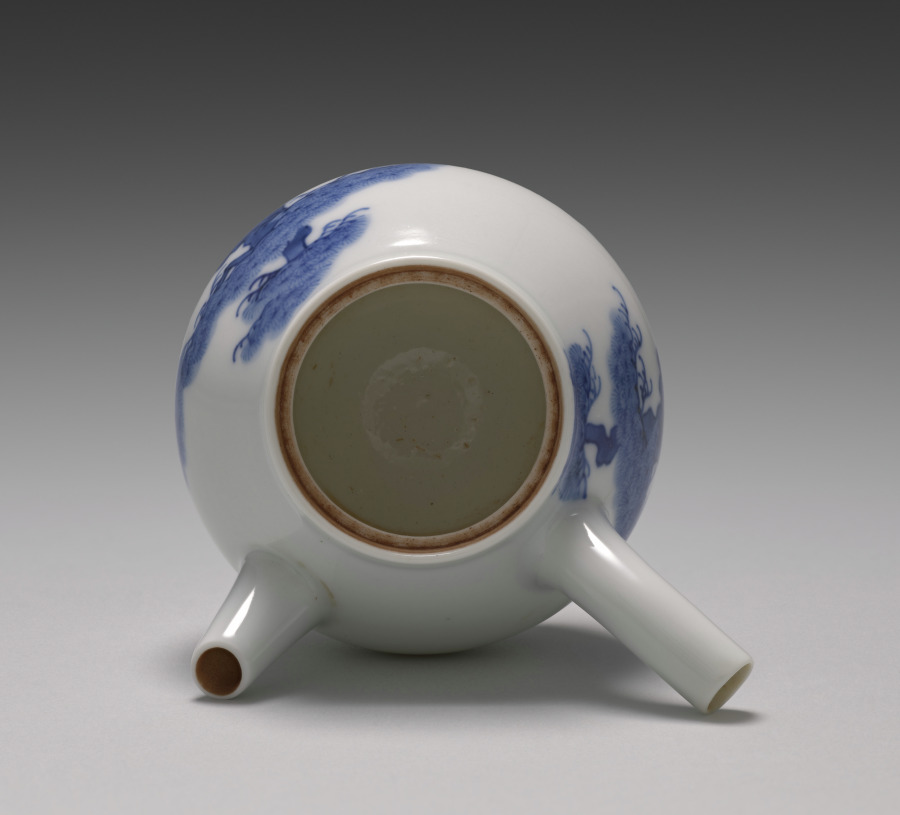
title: Teapot with Pines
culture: Japan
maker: Seifū Yohei III (Japanese, 1851–1914)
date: 1893–1914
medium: Porcelain with underglaze blue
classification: Ceramic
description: Side-handled teapots known as kyūsu and hot water coolers, or yuzamashi, are essential components of sencha tea sets. The teapot is, of course, meant for steeping and serving the tea. Yuzamashi are used to cool boiled water to the ideal temperature for the type of tea to be brewed. This teapot has a pine in underglaze blue on each side. The tip of one of these pines reaches onto the tiny lid, and as with the trees on the Water Cooler with Pines, CMA 2022.163, the trunks are curvy ribbons with little definition. Considering the execution of their designs, one might imagine the pot and cooler to have been part of the same set.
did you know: The teapot's box has a seal of Yamamoto Shōseidō, a shop in Osaka that sold fine ceramics.